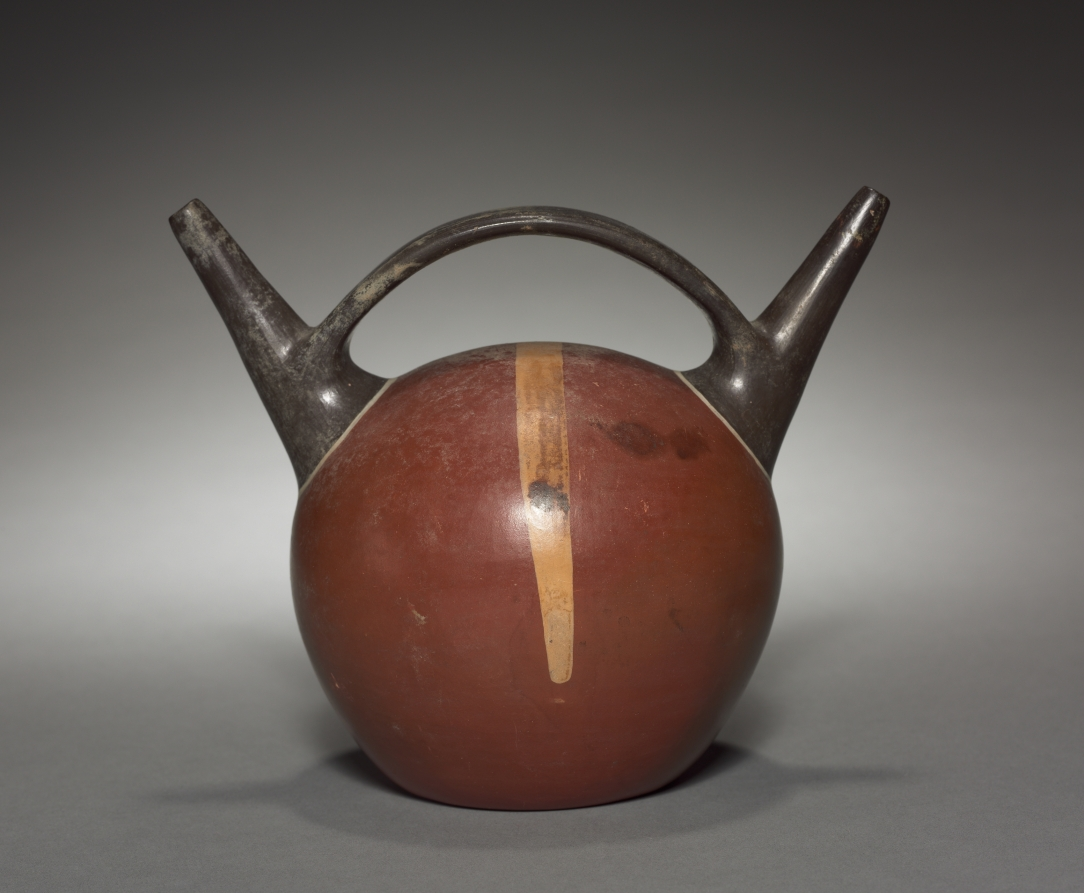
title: Skull Vessel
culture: Wari (Pachacamac) style, Middle Horizon, Epoch 2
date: 500–900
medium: earthenware with colored slips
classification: Ceramic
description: This vessel's clear, vibrant color reveals the inspiration of Wari ceramics in those of the South Coast Nasca. The twin spouts joined by a flat, handle-like bridge are also an old South Coast spout type.